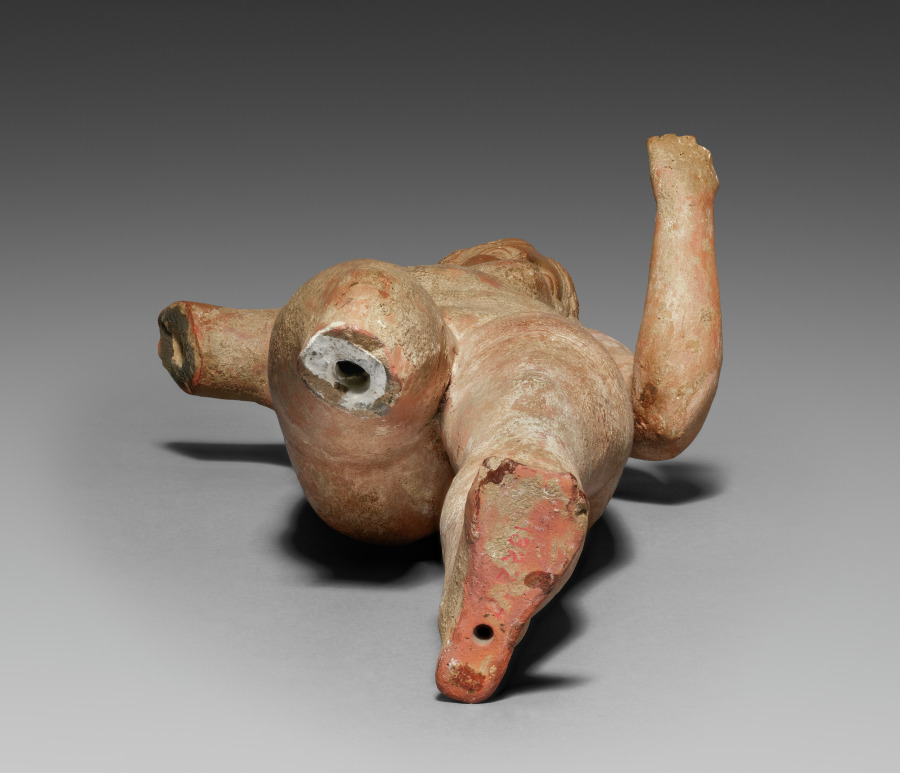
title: Aphrodite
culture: Greece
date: 400–200 BCE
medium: terracotta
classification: Sculpture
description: This nude figurine was likely inspired by the Aphrodite of Knidos by Praxiteles, a work that spawned countless reproductions of varying sizes in different media. Created from inexpensive terra cotta clay, this Aphrodite might have been commissioned as a votive offering by a person of modest means.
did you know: This Aphrodite may be admiring her reflection in a mirror once held in her left hand.